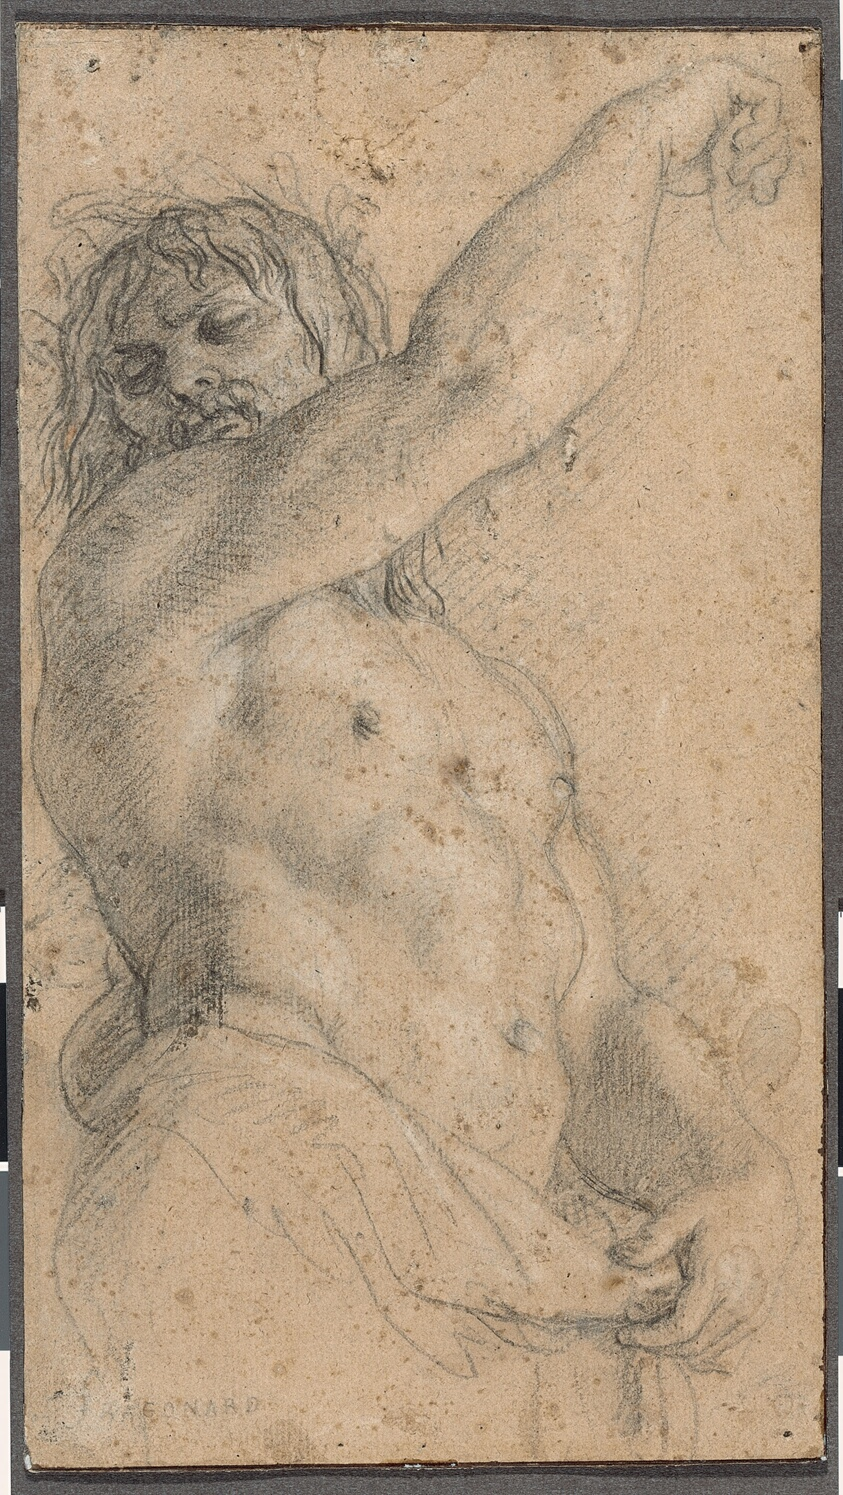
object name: Drawing and Watercolor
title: Study for a Herm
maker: Charles Le Brun (French, 1619–1690)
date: 1674/78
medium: Black chalk, heightened with touches of white chalk and traces of graphite, on tan laid paper, laid down on tan laid paper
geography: France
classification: chalk; drawings (visual works); paper; prints and drawing